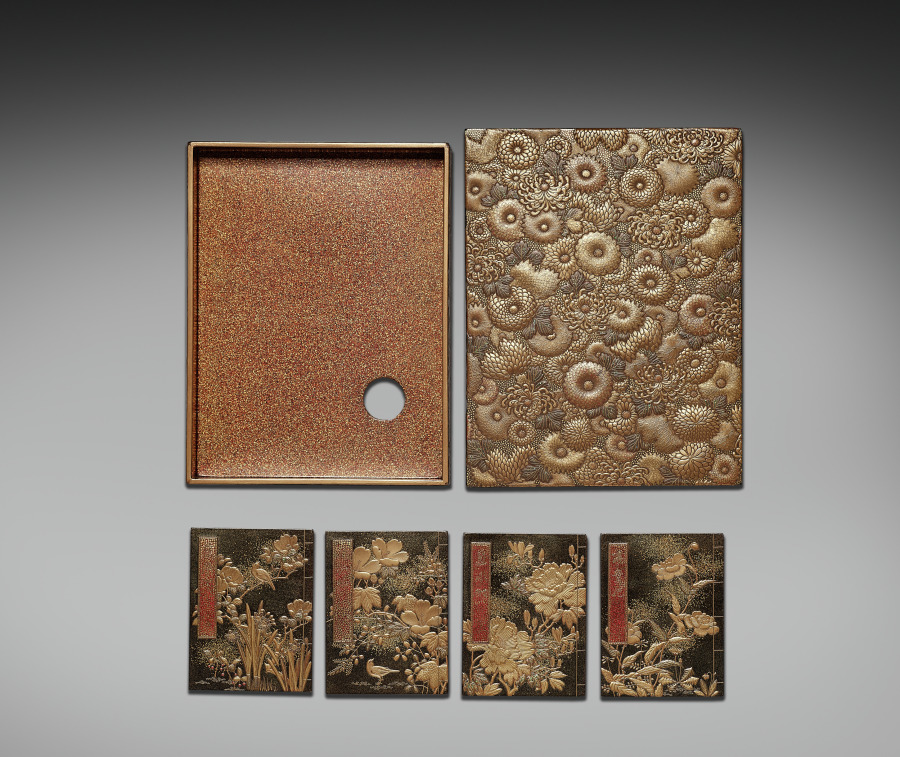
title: Nested Boxes with Chrysanthemums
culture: Japan, Meiji period (1868–1912)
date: early 1900s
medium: Set of five boxes; lacquered wood with sprinkled gold powder (maki-e)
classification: Lacquer